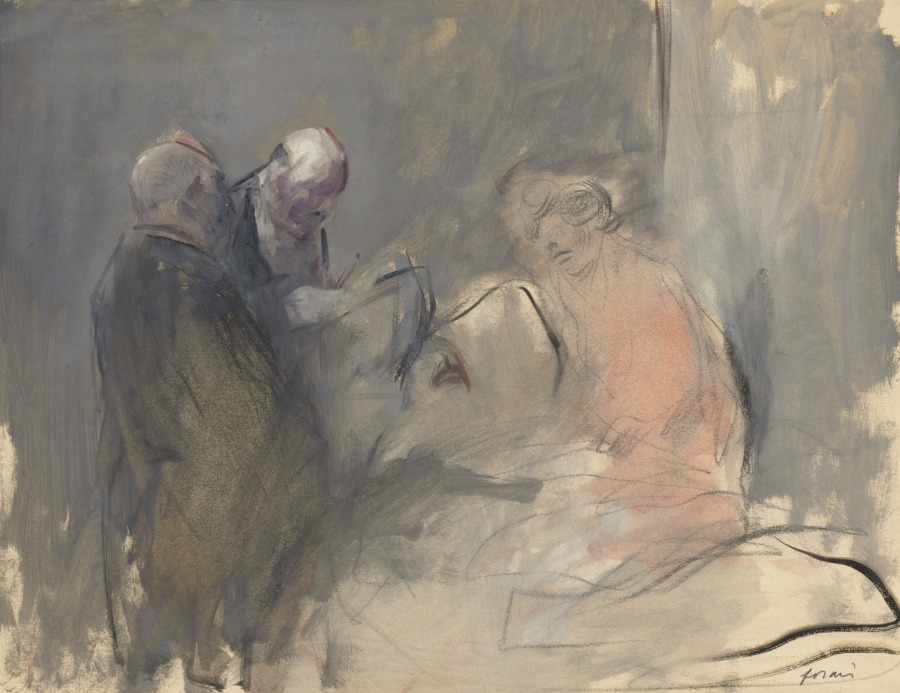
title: In the Hospital (recto) Sketch for In the Hospital (verso)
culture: France, late 19th-early 20th Century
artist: Jean Louis Forain (French, 1852–1931)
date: fourth quarter 1800s or first third 1900s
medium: watercolor and gouache over black crayon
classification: Drawing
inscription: signed, lower right, in graphite: forain ; lower left, in graphite: 61 ; lower right, in graphite: A 2334